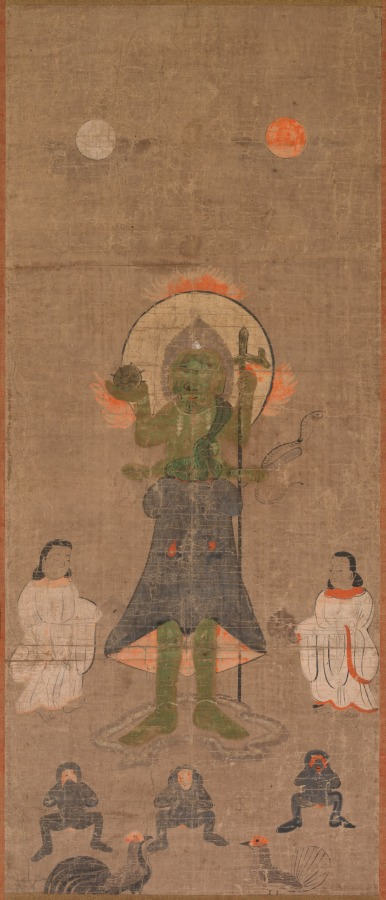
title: Shomen Kongo: The Blue-Faced Kongo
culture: Japan, Edo period (1615–1868)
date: 1615–99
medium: hanging scroll; ink and color on paper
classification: Painting